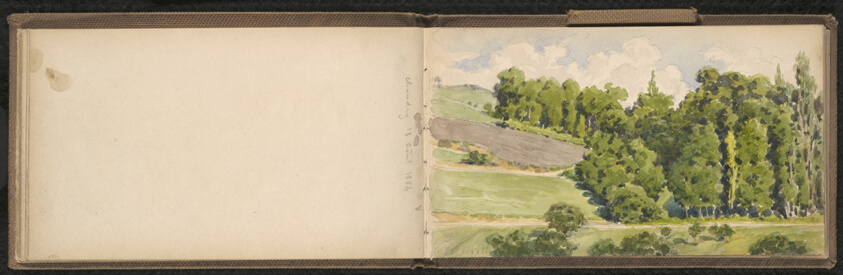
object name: Drawing and Watercolor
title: Sketchbook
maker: Gustave Caillebotte (French, 1848–1894)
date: June 1883–September 1887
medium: Sketchbook containing 40 drawings: 30 in graphite, 7 in watercolor over graphite, and 3 in graphite and brush and gray wash, on 40 sheets of cream wove paper bound in brown cloth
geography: France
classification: sketchbook; watercolor; prints and drawing; paper